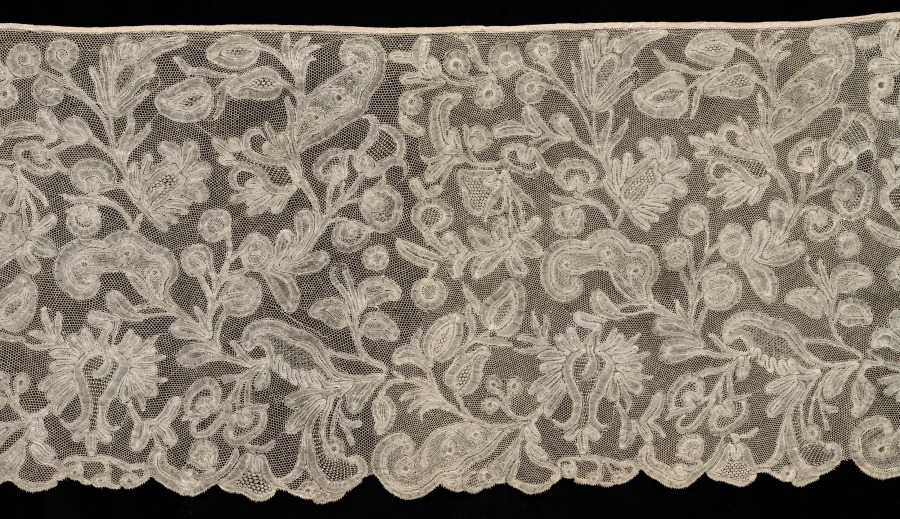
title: Lace Flounce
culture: Italy, Milan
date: 1700s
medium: Linen: bobbin lace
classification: Lace